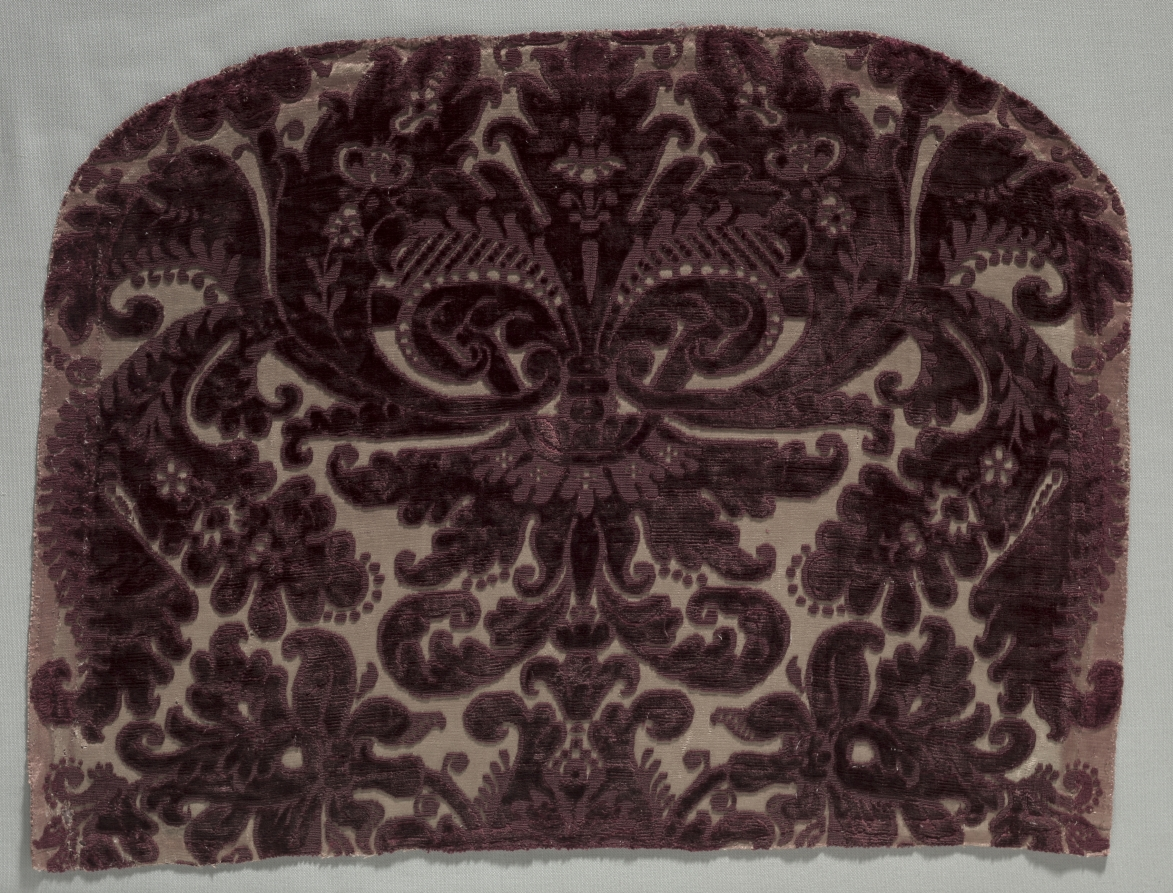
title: Velvet Fragment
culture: Italy, Genoa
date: 1600s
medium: velvet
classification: Velvet